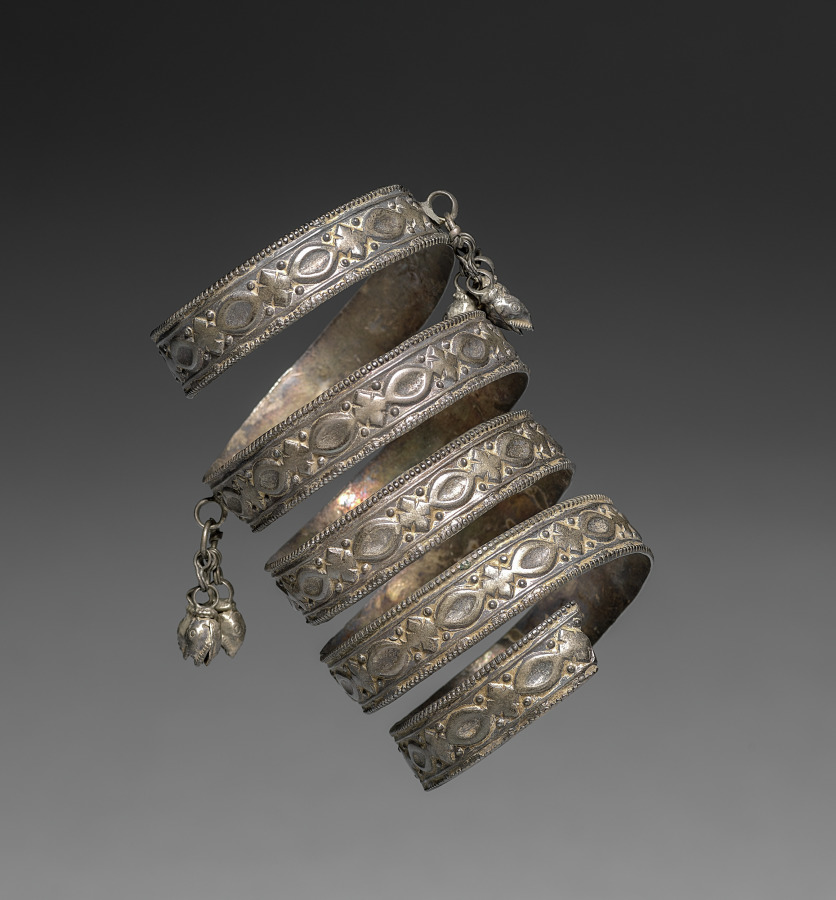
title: Spiral Armlet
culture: India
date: 1800s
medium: silver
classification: Jewelry